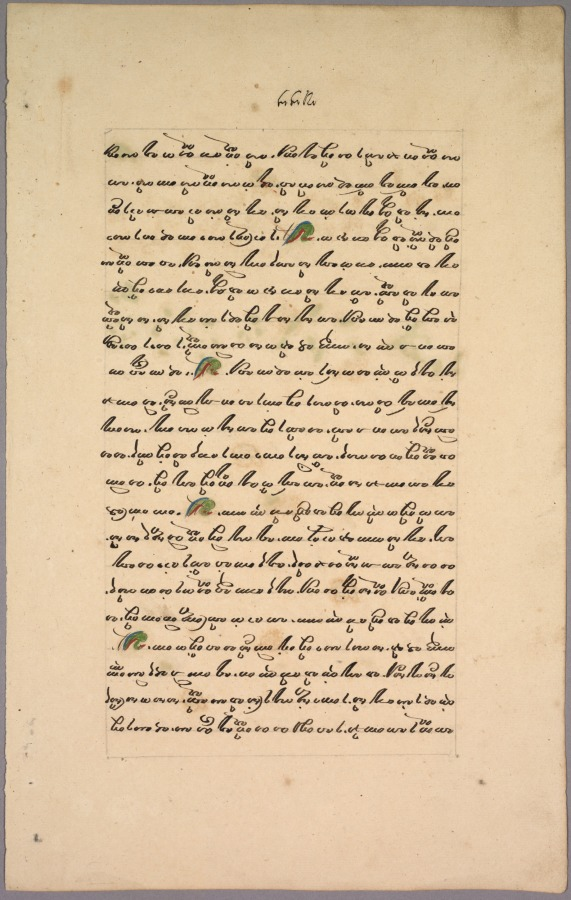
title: Page from Ramayana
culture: Java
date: 1800s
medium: ink on paper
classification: Manuscript